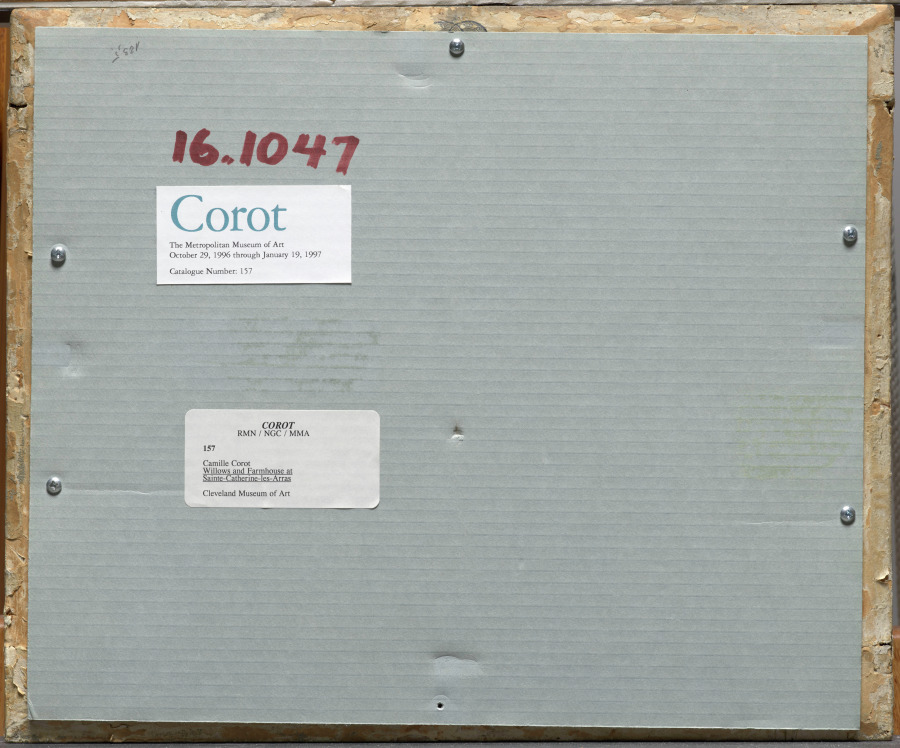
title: Willows and Farmhouse at Sainte-Catherine-lès-Arras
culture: France, 19th century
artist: Jean Baptiste Camille Corot (French, 1796–1875)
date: 1871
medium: oil on fabric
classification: Painting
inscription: Signed lower left: corot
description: With its quiet water and sky, fluffy trees, and other foliage flecked with light, this picture exemplifies the style that won Corot success with a wide public. It was painted during the artist's stay at Arras (about 100 miles north of Paris) in 1871.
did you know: Corot began his career as a draper and his exposure to the colors and textures of fabrics helped him develop an astute aesthetic sense.